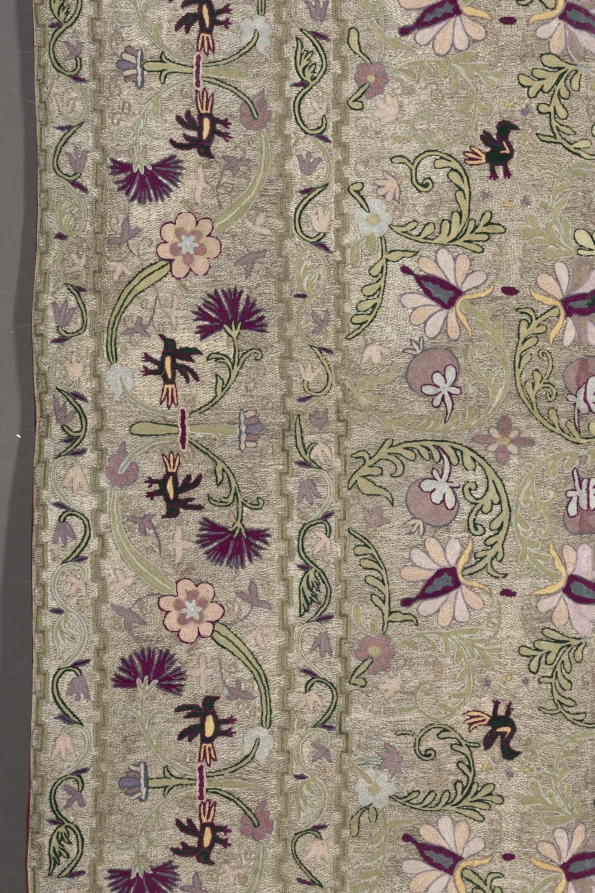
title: Coverlet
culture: India, 19th century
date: 1800s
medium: embroidery; silk and gold filé on linen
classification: Embroidery